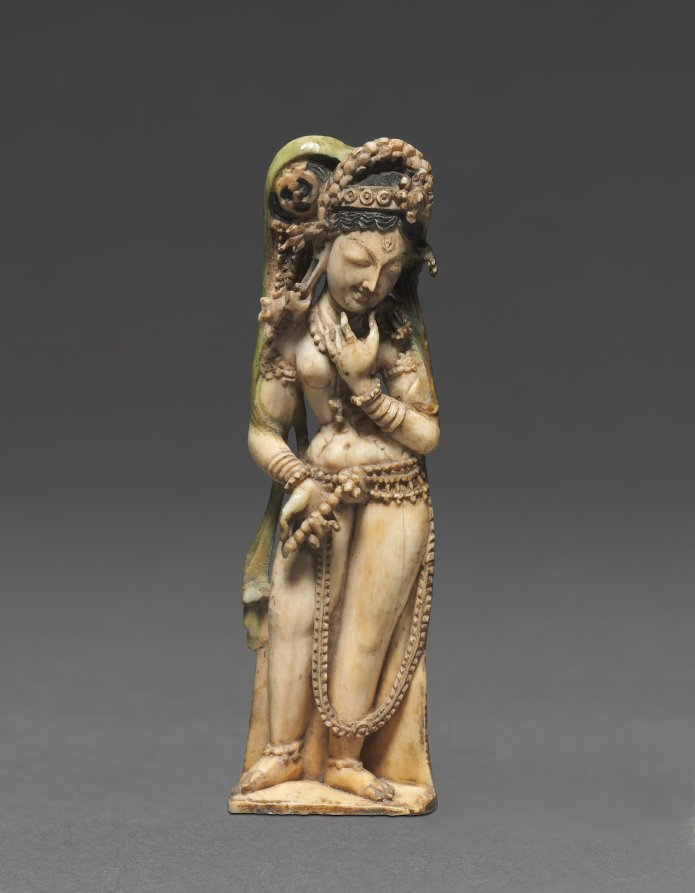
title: Female Attendant Bearing a Lotus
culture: India, Kashmir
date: 700s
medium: ivory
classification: Ivory